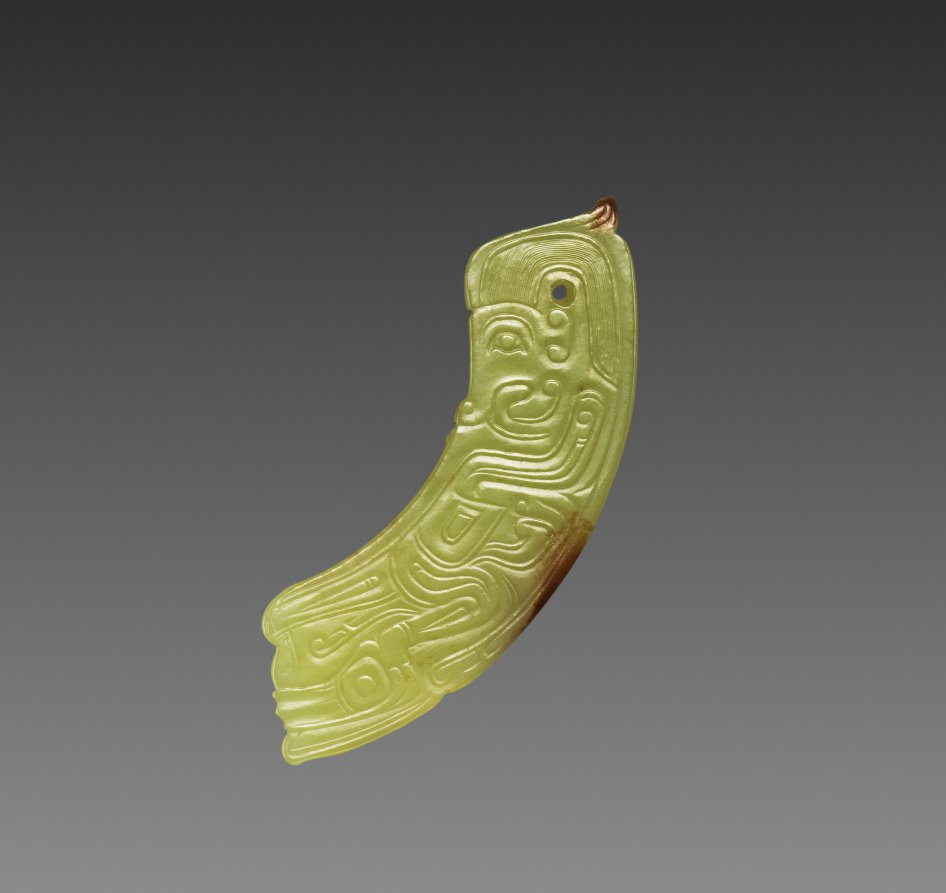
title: Arc Pendant with Human-like Figure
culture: China, Western Zhou dynasty (c. 1046–771 BCE)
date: c. 1050–771 BCE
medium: nephrite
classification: Jade